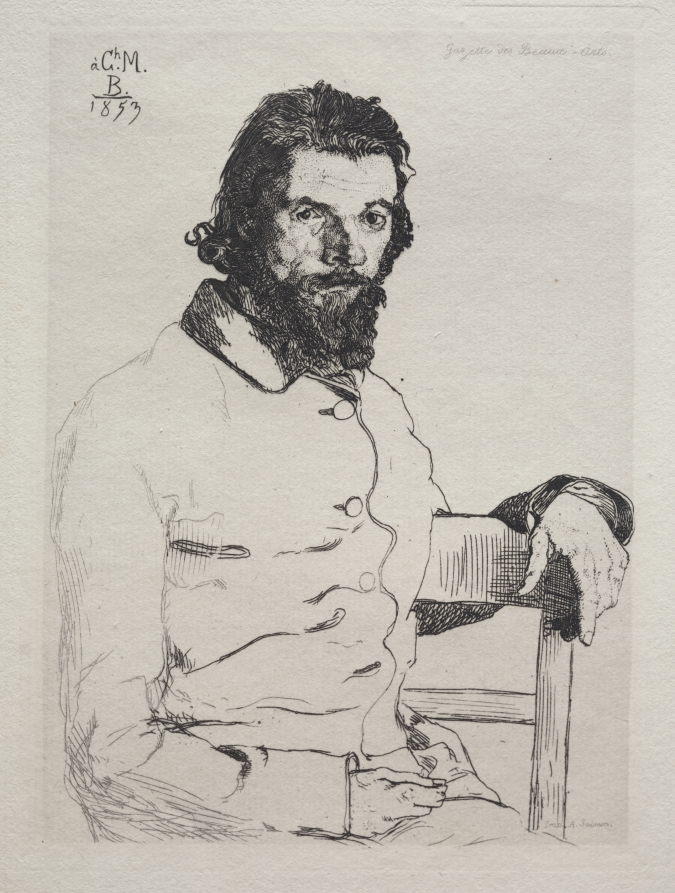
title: Charles Méryon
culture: France, 19th century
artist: Félix Bracquemond (French, 1833–1914)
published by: Gazette des Beaux-Arts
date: 1884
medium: heliogravure after etching of 1853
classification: Print